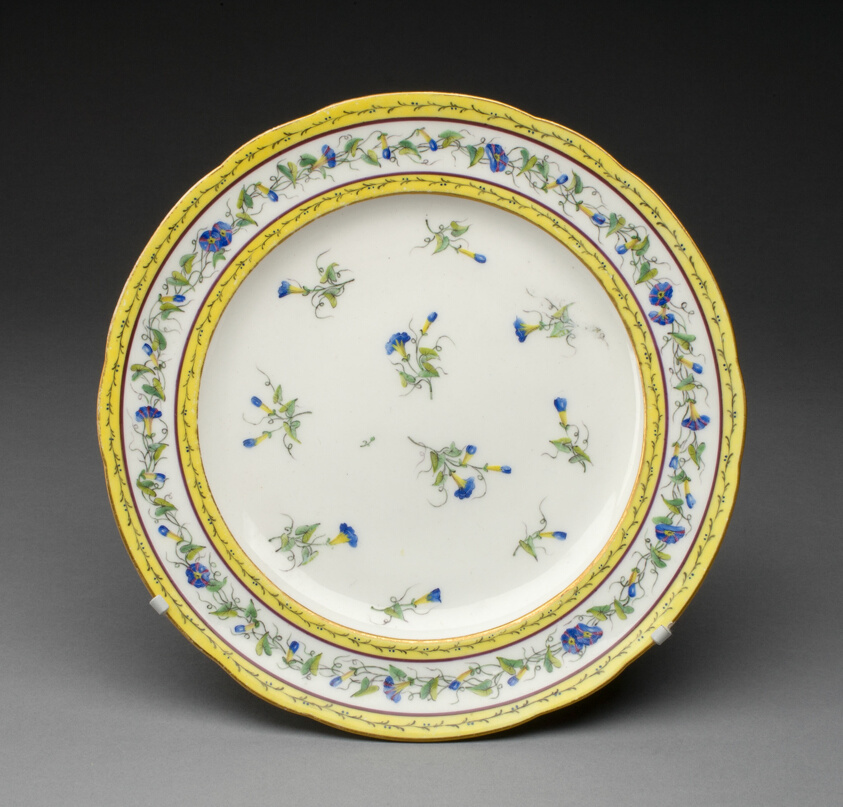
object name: Ceramics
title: Plate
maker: Sèvres Porcelain Manufactory; French, founded 1740; Painted by André-Vincent Vielliard; French, 1717-90, active 1752-90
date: 1788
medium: Soft-paste porcelain, polychrome enamels, and gilding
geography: Sèvres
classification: plate (general, dish); tableware; dish (vessel); ceramics; porcelain; european decorative arts